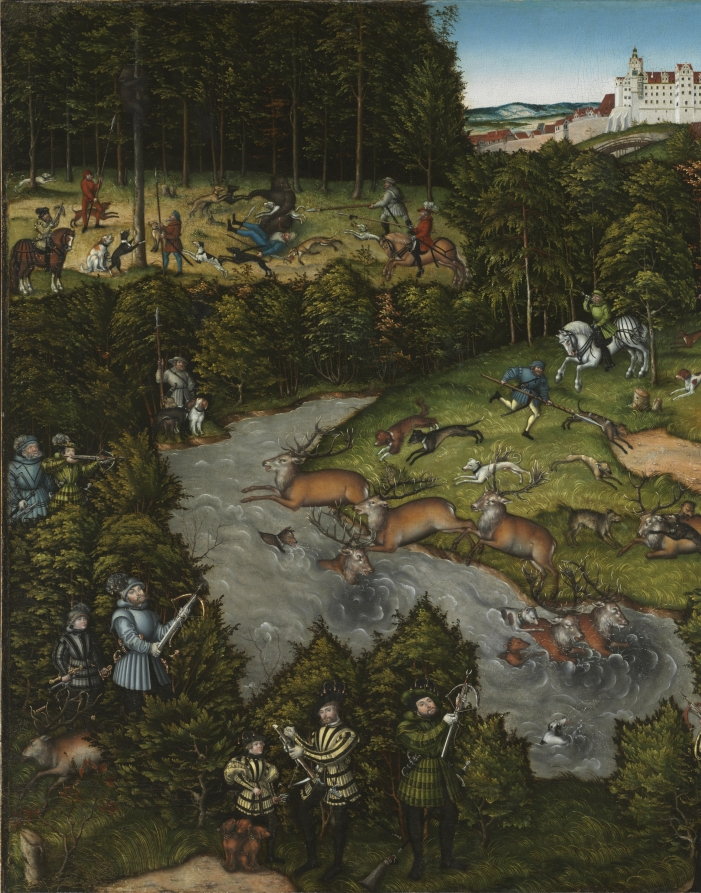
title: Hunting near Hartenfels Castle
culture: Germany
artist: Lucas Cranach (German, 1472–1553)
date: 1540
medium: oil, originally on wood, transferred to masonite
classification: Painting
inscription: Signed lower right on boat with a winged serpent, and dated: 1540 [inventory number, lower right: 1577]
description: The Protestant rulers of Saxony commissioned this animated hunt scene, set near their residence seen in the background, Hartenfels Castle (in eastern Germany). John Frederick the Magnanimous, in the bottom left corner, wears dark green hunting attire; he spans his crossbow and waits for his courtiers and dogs to chase a stag across the river. His wife, the Electress Sibylle, stands at right, poised to take the first ceremonial shot. The prince electors of Saxony were passionate practitioners of hunting with dogs—elaborate, highly rehearsed occasions, coordinated by the use of signals from hunting horns. Cranach dated this work and his signature is the winged snake at lower right. 1577 in the right corner is an inventory number.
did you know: Humans, dogs, and deer make up most of the creatures in this busy scene—but not all of them! Look closely at the background to spot a bear and three boars.